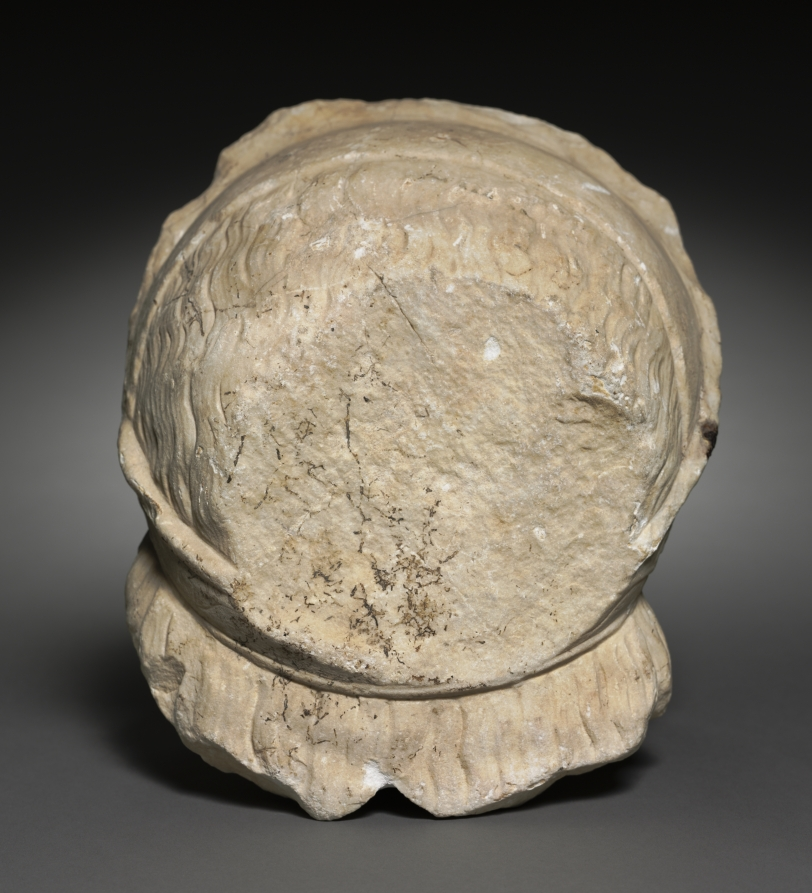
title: Head of a Young Woman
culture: Italy, Roman (archaizing)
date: 25–1 BCE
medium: marble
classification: Sculpture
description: This head of a young woman is designed after Greek art in the Archaic period (c. 600–480 BCE). She references a type of Greek statue called a kore in her heavily patterned hair, almond-shaped eyes, neutral expression, and large disk earrings, best preserved on the right ear. Her stephane or diadem crown is from the later Hellenistic period; however, with the addition of the decorative vegetal scroll it is characteristic of Roman art. All these elements together are not found in original Greek archaic artworks. This ancient combination of deliberately historic styles is called archaizing or archaistic by modern scholars.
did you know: When Rome conquered Greece in 146 BCE, Romans developed a taste for historic Greek art.